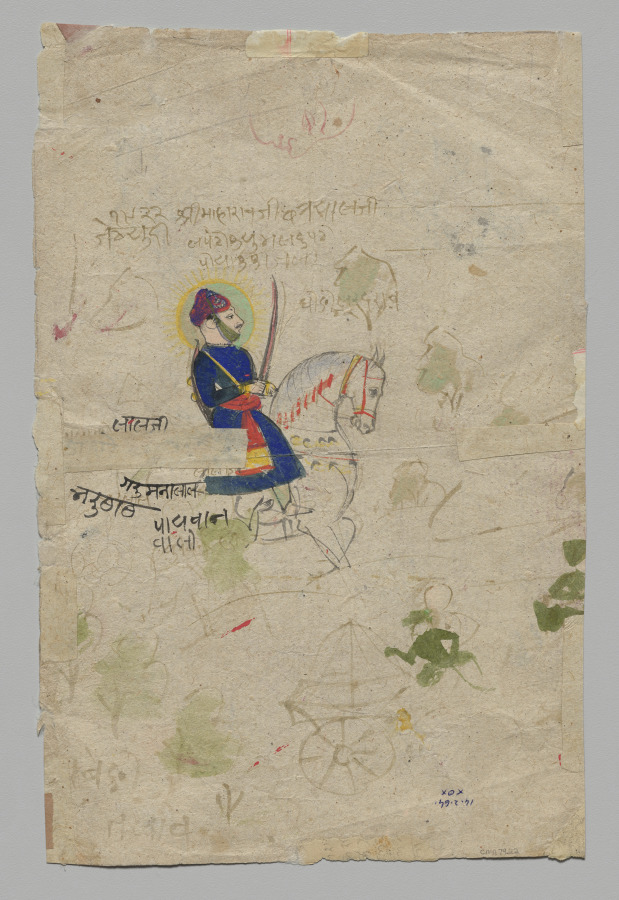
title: Page of Sketches with a Portrait of Sri Maharaj Chatter Singhji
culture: India, Rajasthan, Kota, 19th century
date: c. 1866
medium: Gum tempera and ink on paper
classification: Drawing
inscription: on verso: Shri Maharaji Chatter Singhji